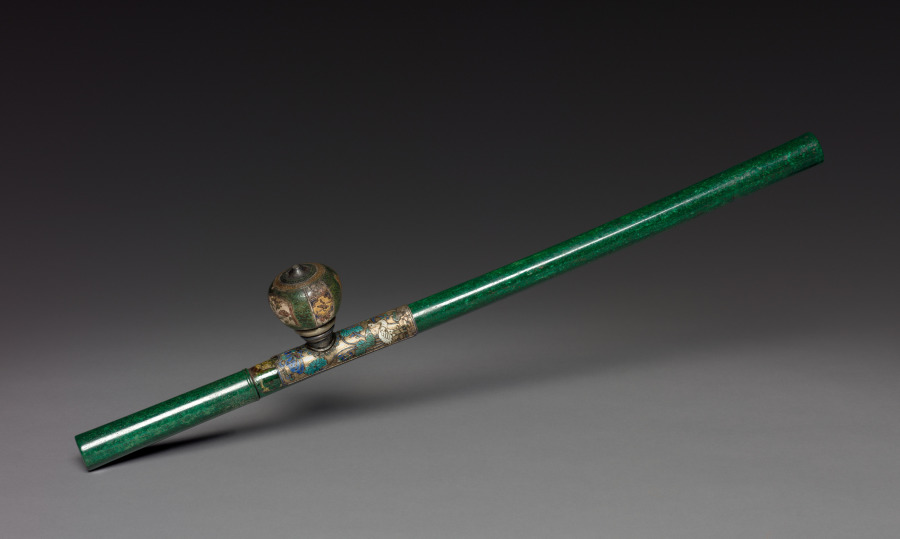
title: Opium Pipe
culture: China, Qing dynasty (1644-1911)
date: 1800s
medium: green stem decorated with enamel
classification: Miscellaneous